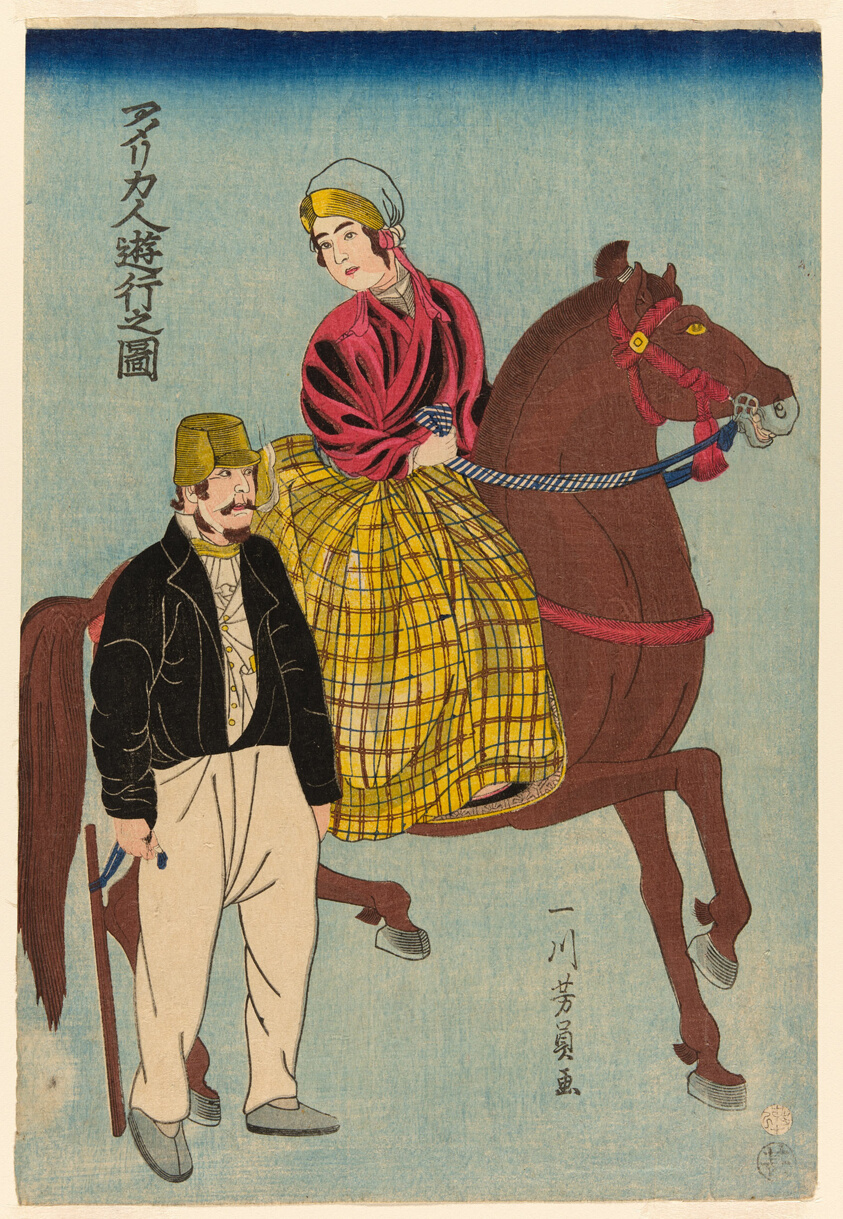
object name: Print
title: Americans on an Outing (Amerikajin yuko no zu)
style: Japanese (culture or style)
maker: Utagawa Yoshikazu (Japanese, active c. 1850–70)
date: 1860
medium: Color woodblock print; oban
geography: Japan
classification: woodblock print; print; asian art